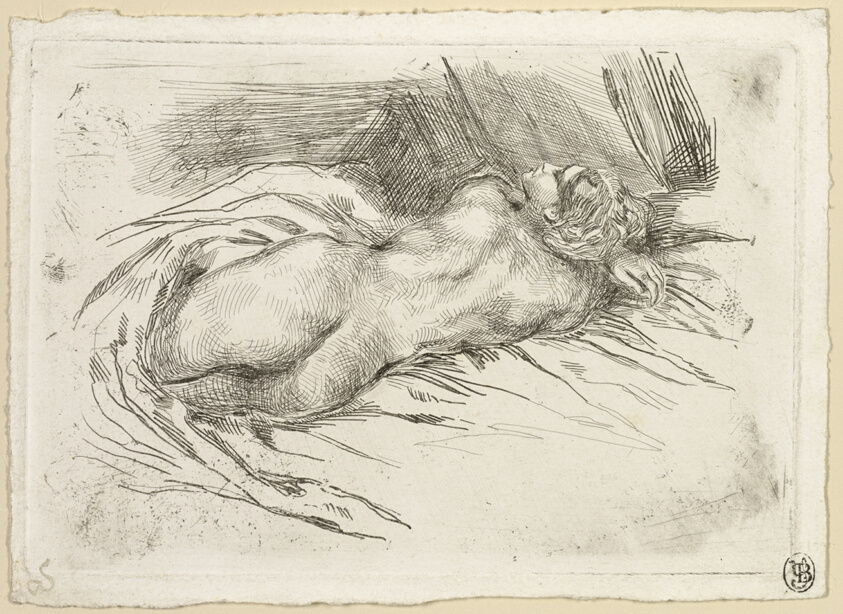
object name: Print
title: Study of a Woman Seen from the Back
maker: Eugène Delacroix (French, 1798-1863)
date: 1833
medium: Etching in black on off-white wove paper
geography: France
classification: etching; print; prints and drawing